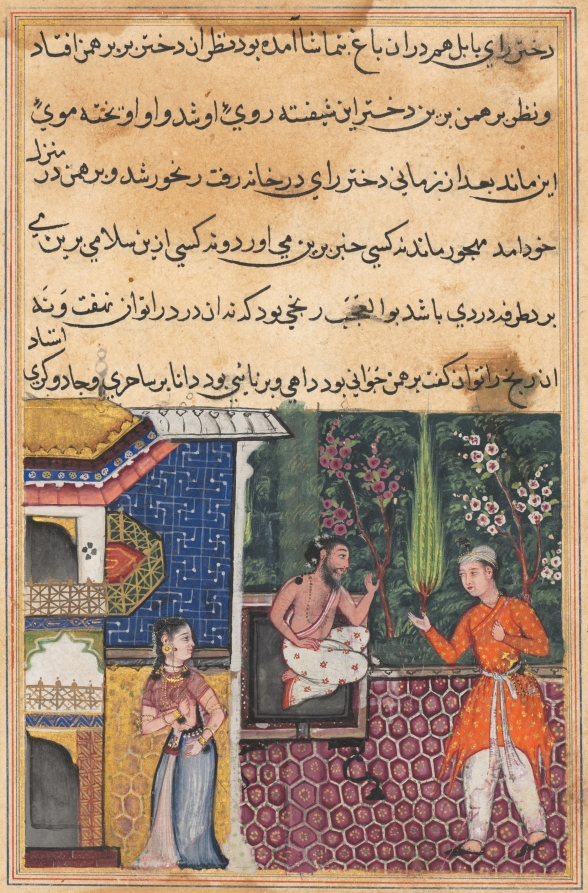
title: The Brahman gives an account of his falling in love with the king of Babylon’s daughter to his friend, the magician, from a Tuti-nama (Tales of a Parrot): Thirty-fifth Night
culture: Mughal India, court of Akbar (reigned 1556–1605)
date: c. 1560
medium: gum tempera, ink, and gold on paper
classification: Painting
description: The figure in orange is a magician addressing a seated Brahman—a member of India’s Hindu priestly class—who has come to him for help. He and the princess of Babylon have fallen in love and want to be together, but she is sequestered in the palace harem. The magician transformed the Brahman into a woman, shown at left, walking toward the palace. This is an example of continuous narration, in which two scenes are depicted in the same picture plane. The garden with flowering trees in the background evokes the setting where the Brahman and the princess met and fell in love.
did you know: Brahmans wear a sacred thread across their upper bodies, over the left shoulder and under the right arm.